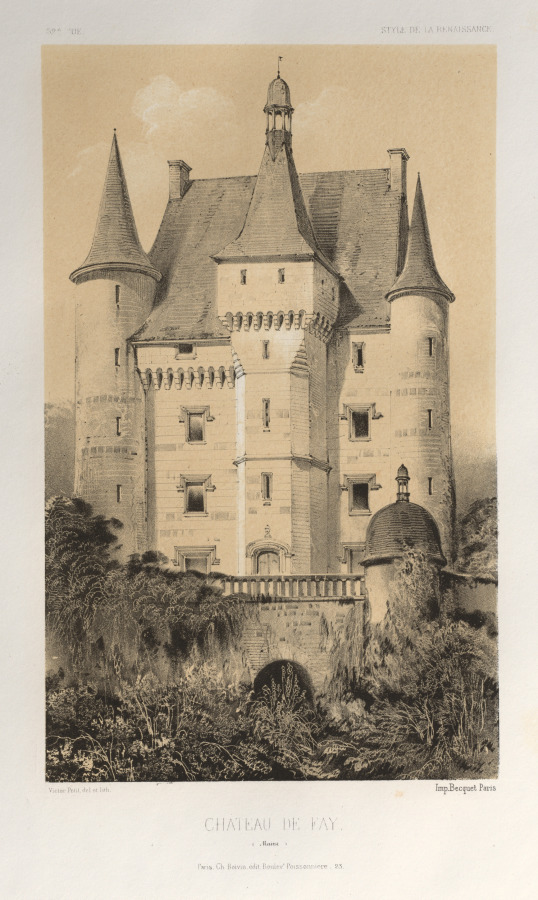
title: Architecture Pittoresque ou Monuments des XVeme. Et XVIeme. Siecles: Chateaux de France des XV et XVI Siecles: Pl. 52, Château De Fay (Maine)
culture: France, 19th century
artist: Victor Petit (French, 1817–1874)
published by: Charles Boivin (publisher and editor); Lith de Godard a Paris (printer)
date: 1860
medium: lithograph with tint stone, from portfolio of 100 lithographs with tint stone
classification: Print